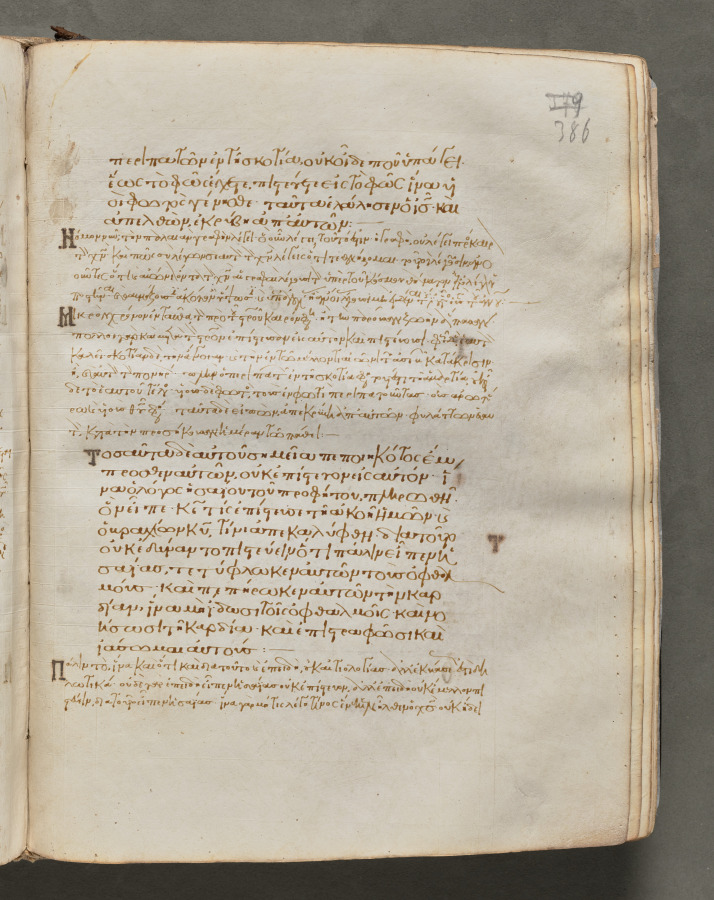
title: Text, folio 386 (recto), from a Gospel Book with Commentaries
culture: Byzantium, Constantinople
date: c. 1000–1100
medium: ink, tempera, and gold on vellum; leather binding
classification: Bound Volume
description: Each of the four gospels in this book opens on a page with brilliantly illuminated borders depicting the author of the text as well as birds—principally peacocks, symbols of the immortality of the soul—and fountains, representing the fountain of life and the salvation of the soul. This volume consists of 428 leaves with texts in Greek. Its level of sophistication suggests that it was probably written and decorated in a monastery in Constantinople.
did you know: Gospel books were carried in procession through Byzantine churches.